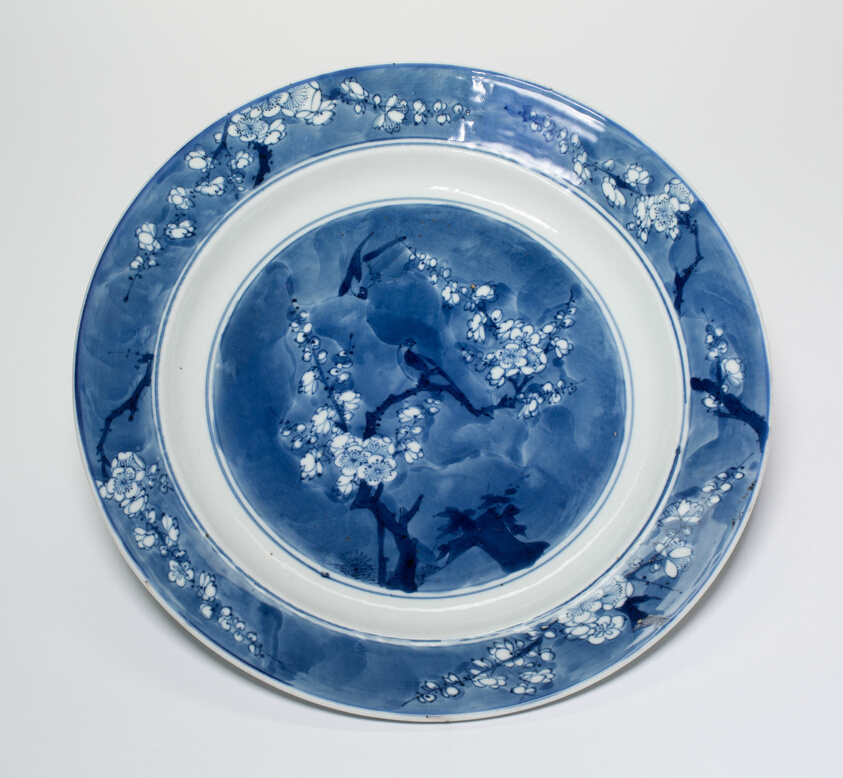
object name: Vessel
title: Dish with Plum Flowers and Birds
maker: China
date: Qing dynasty (1644–1911), late 18th/19th century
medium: Porcelain painted in underglaze blue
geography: China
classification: porcelain; asian art; ceramics